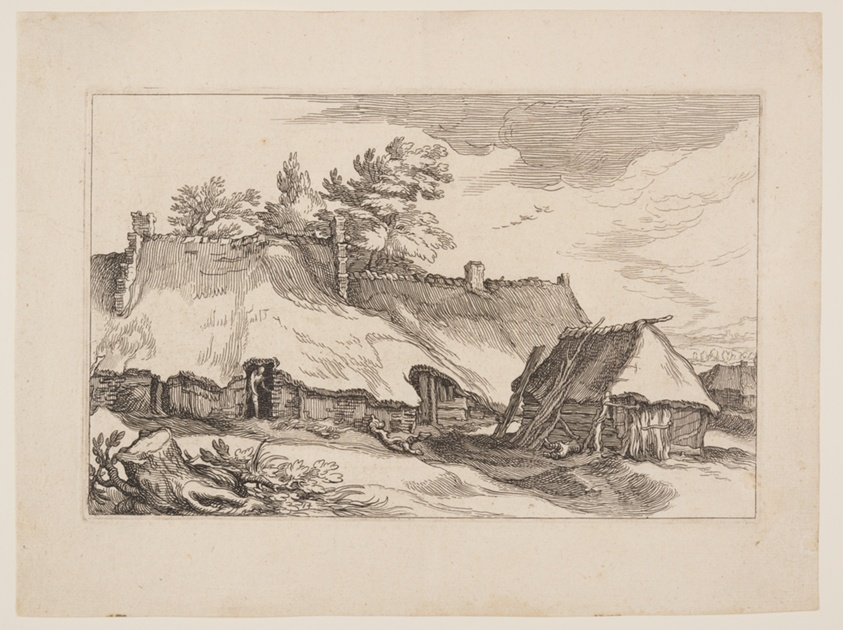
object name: Print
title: Plate 14, from Landscapes with Farmhouses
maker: Boëtius Adamsz. Bolswert (Flemish, 1580–1633); after Abraham Bloemaert (Dutch, 1566–1651)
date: 1614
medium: Etching on ivory laid paper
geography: Flanders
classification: print; paper; prints and drawing; etching